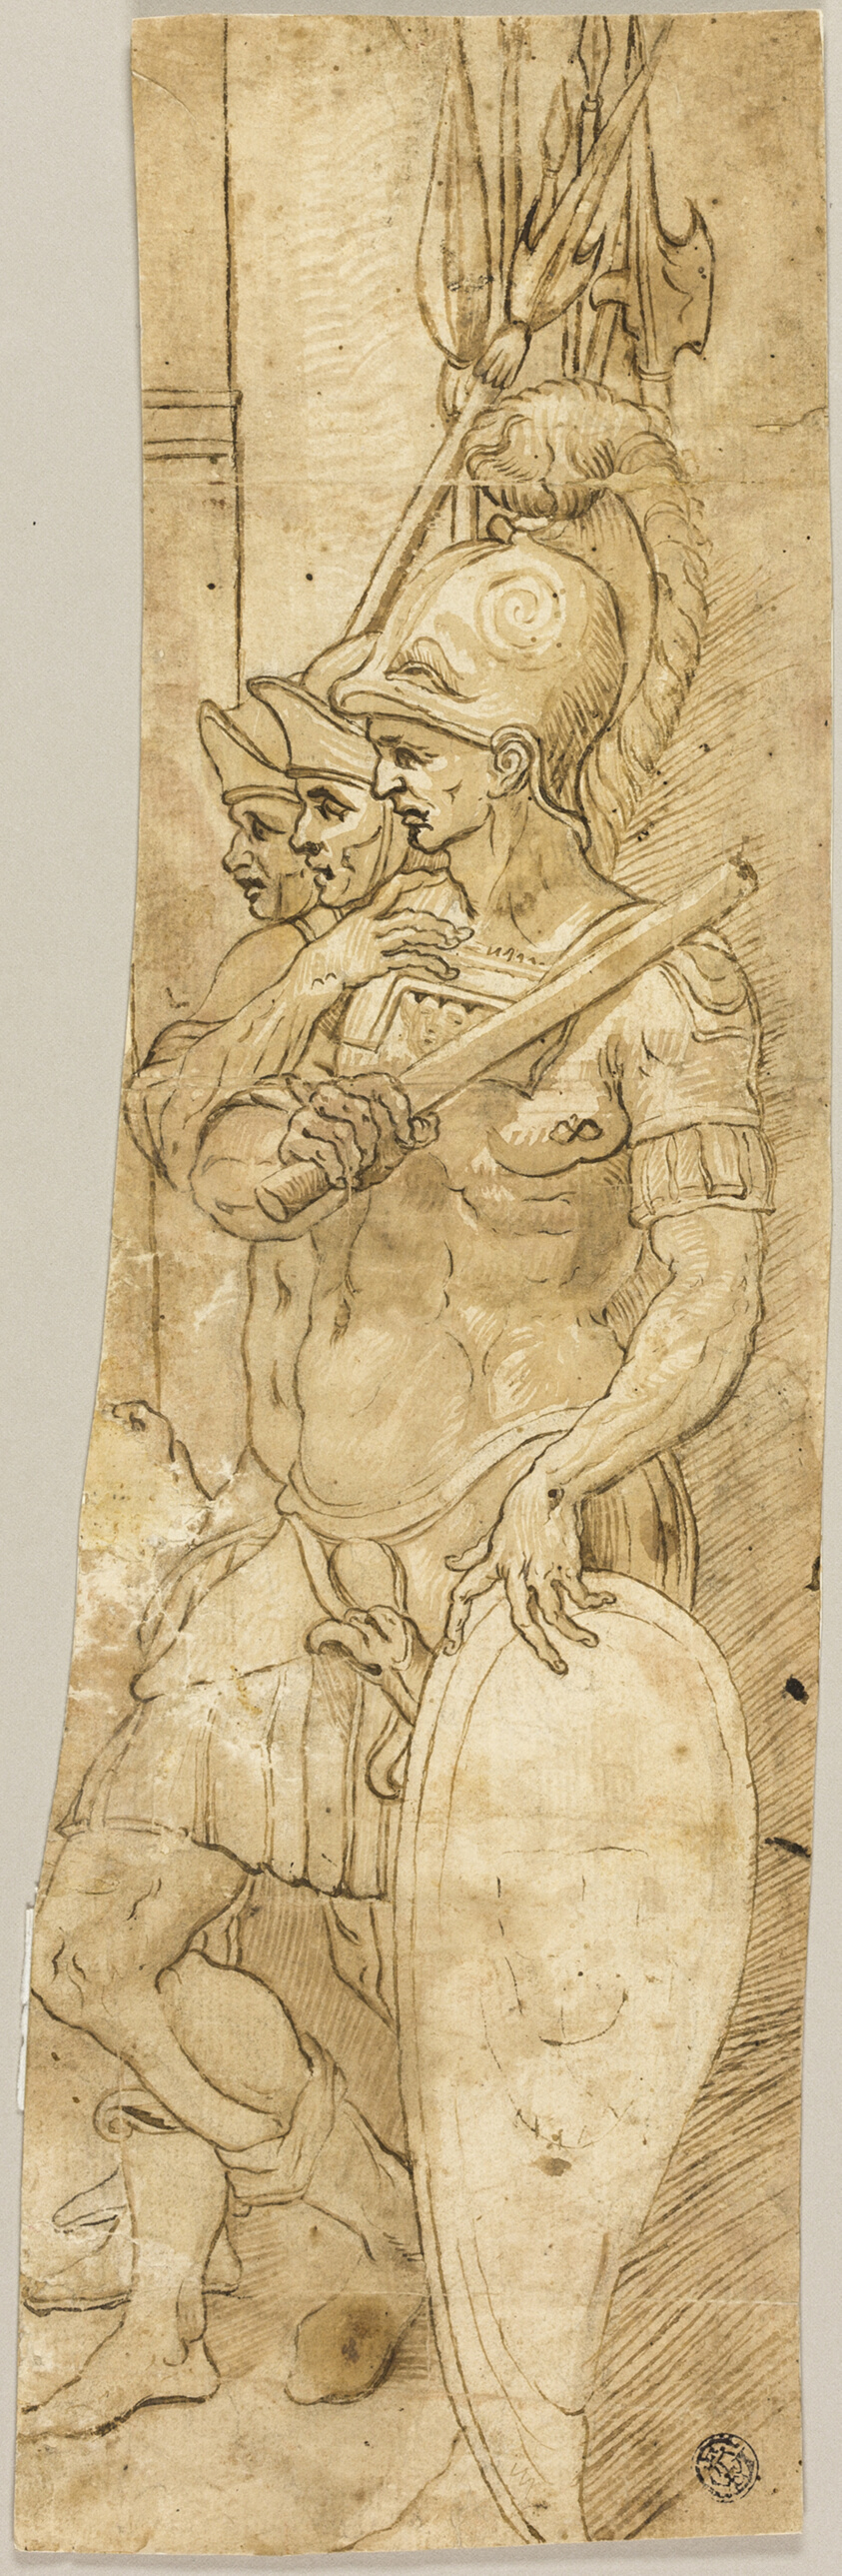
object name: Drawing and Watercolor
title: Three Roman Soldiers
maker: After Giambologna; Italian, 1529-1608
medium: Pen and brown ink, with brush and brown wash, over traces of black chalk, on cream laid paper, laid down on ivory laid paper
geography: Italy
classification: ink and wash; drawings (visual works); prints and drawing